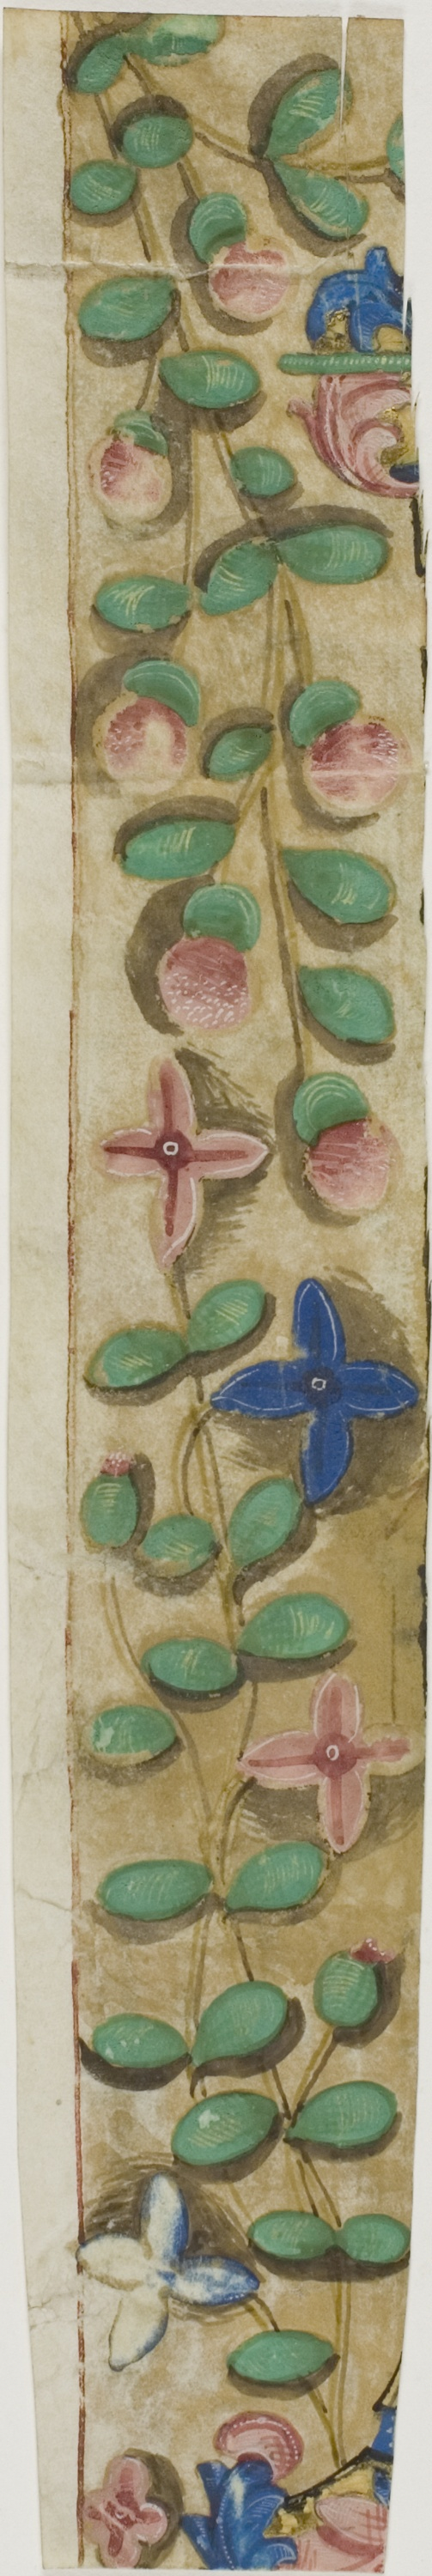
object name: Drawing and Watercolor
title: Illuminated Border with Flowers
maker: European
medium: Manuscript cutting in tempera, colored inks and gold leaf on vellum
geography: Europe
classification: tempera; drawings (visual works); prints and drawing